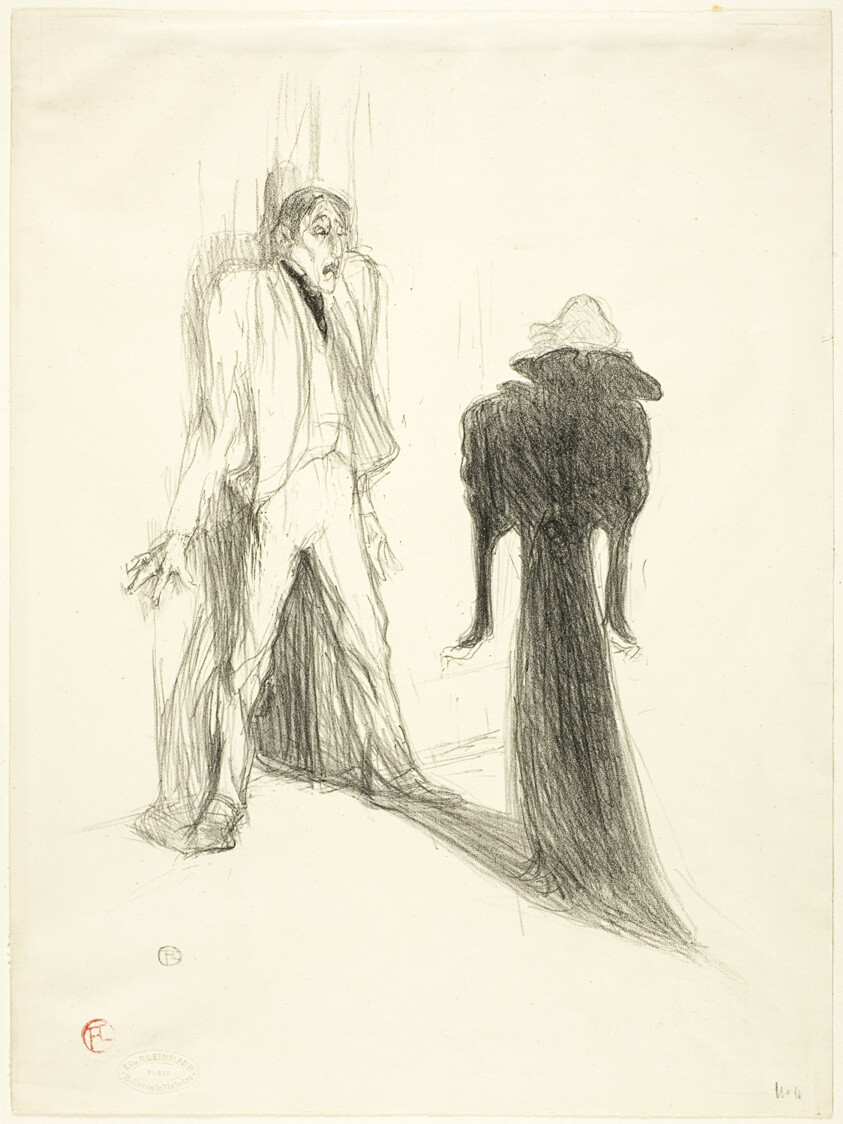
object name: Print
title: Lugné-Poé, in Image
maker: Henri de Toulouse-Lautrec (French, 1864-1901)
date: 1894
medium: Lithograph on cream wove paper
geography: France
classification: lithograph; print; prints and drawing